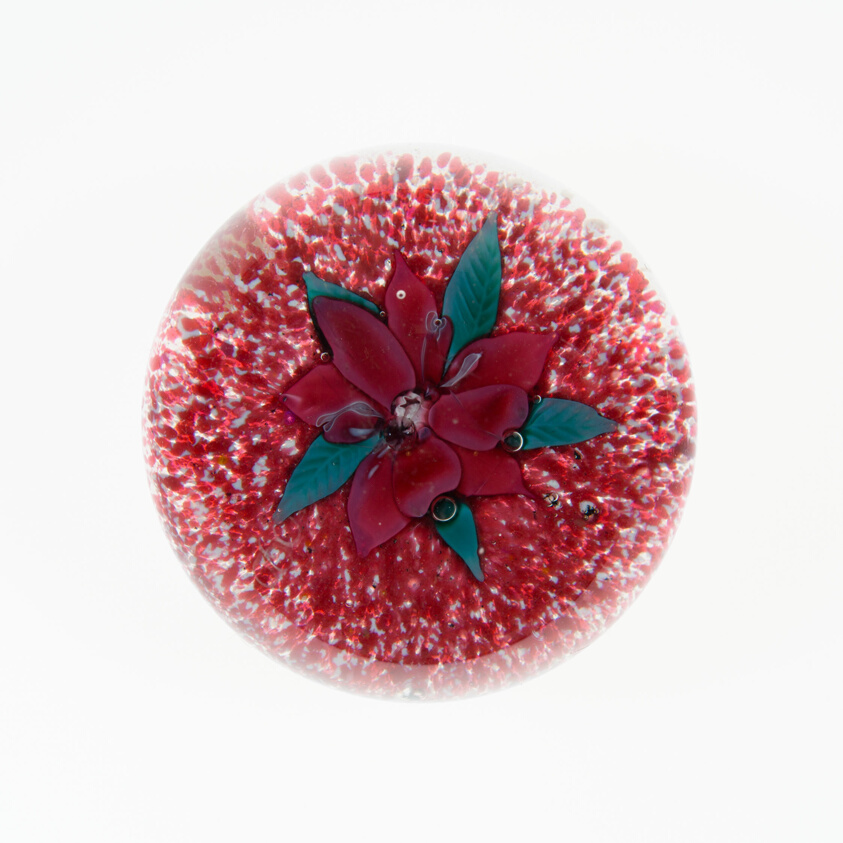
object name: Glass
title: Paperweight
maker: Boston and Sandwich Glass Company (Sandwich, Massachusetts, 1826-1888)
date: 1870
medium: Glass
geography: Sandwich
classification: paperweight; lampwork; european decorative arts; glass